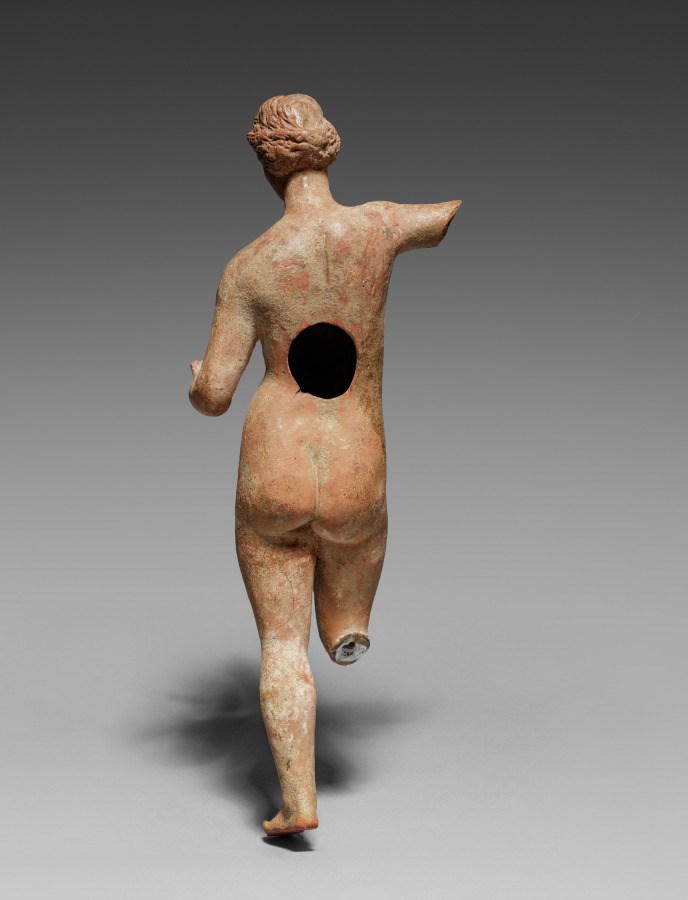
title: Aphrodite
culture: Greece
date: 400–200 BCE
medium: terracotta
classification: Sculpture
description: This nude figurine was likely inspired by the Aphrodite of Knidos by Praxiteles, a work that spawned countless reproductions of varying sizes in different media. Created from inexpensive terra cotta clay, this Aphrodite might have been commissioned as a votive offering by a person of modest means.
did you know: This Aphrodite may be admiring her reflection in a mirror once held in her left hand.